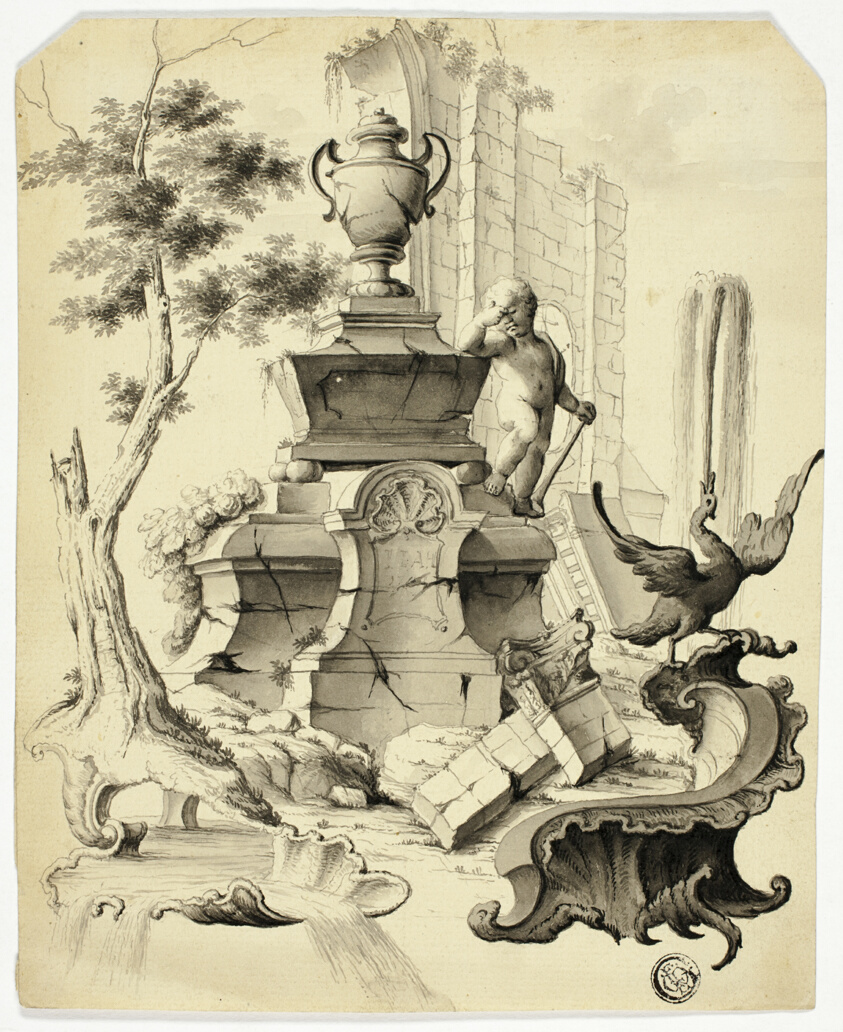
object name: Drawing and Watercolor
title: Rococo Tomb in Ruins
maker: Unknown Artist; German, 18th century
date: 18th century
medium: Pen and black ink, with brush and gray wash, on cream laid paper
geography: Germany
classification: ink or chalk wash; drawings (visual works); prints and drawing